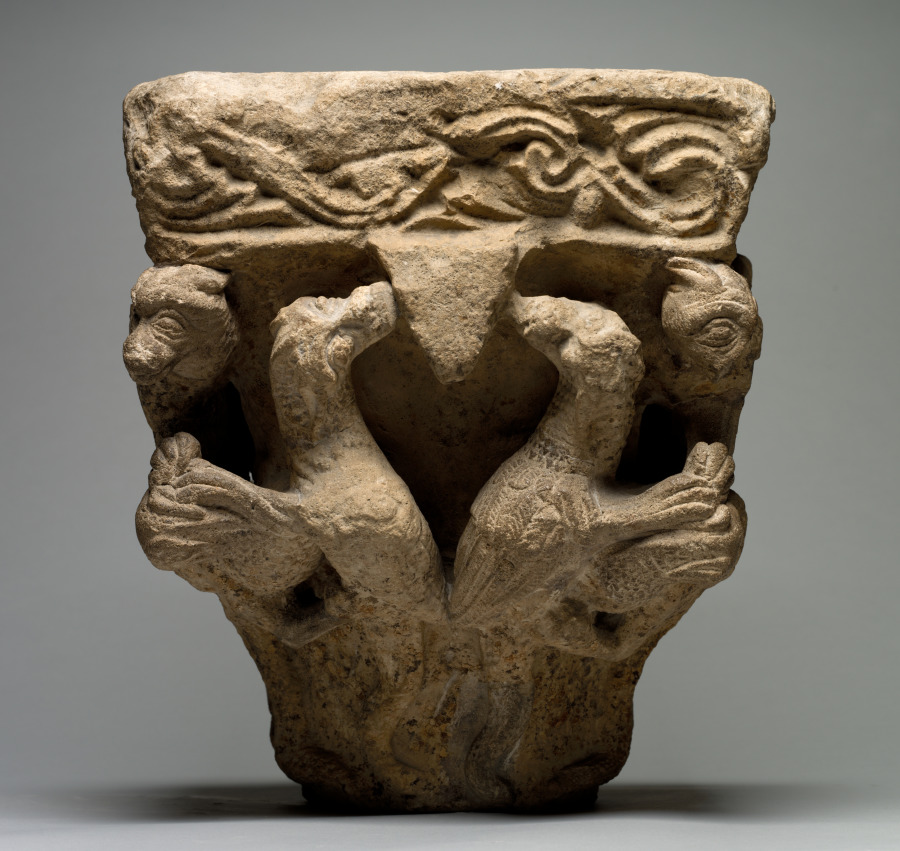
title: Capital with Dragons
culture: Southwest France, Languedoc, Toulouse (?), 13th century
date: 1200s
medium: limestone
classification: Sculpture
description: Monstrous images were prevalent in the decoration of religious buildings during the Middle Ages. Such images must have impressed, perhaps even terrified, the monks and visitors who spent much of their time within the cloister or church, a place of prayer, contemplation, and reflection. Scholars have speculated how such images would have been received by the people given the ubiquity of monsters in medieval society. The carved monsters, often symbolizing vice and retribution for sin, were possibly designed to provoke a range of emotional responses including laughter, wonder, surprise, fear, and shock. This striking imagery must have had a strong impact, which in turn led Saint Bernard of Clairvaux (1090–1153), the spiritual head of the Cistercian order, to admonish their use as distracting from prayer.